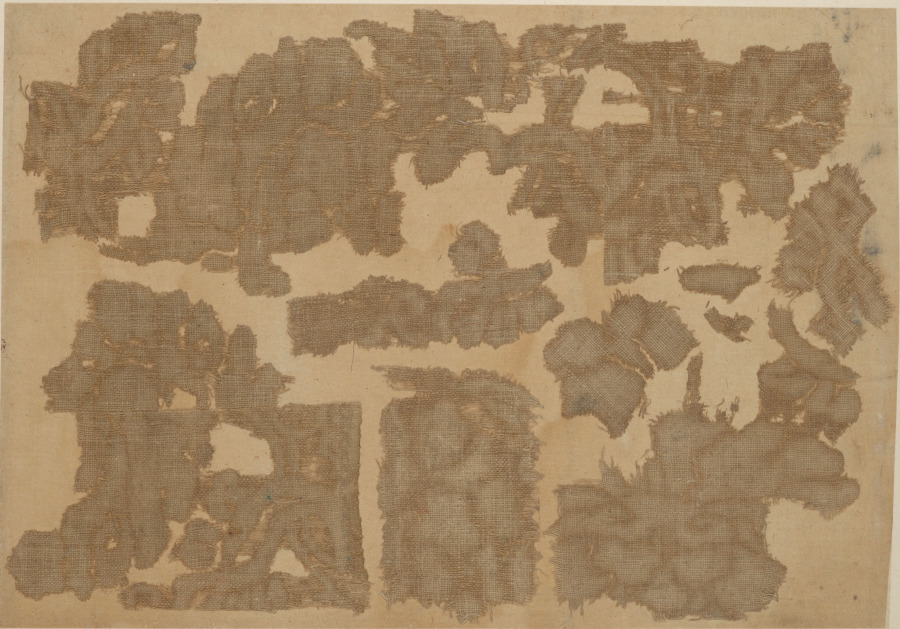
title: Fragment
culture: China or Japan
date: 700s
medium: tabby weave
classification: Textile